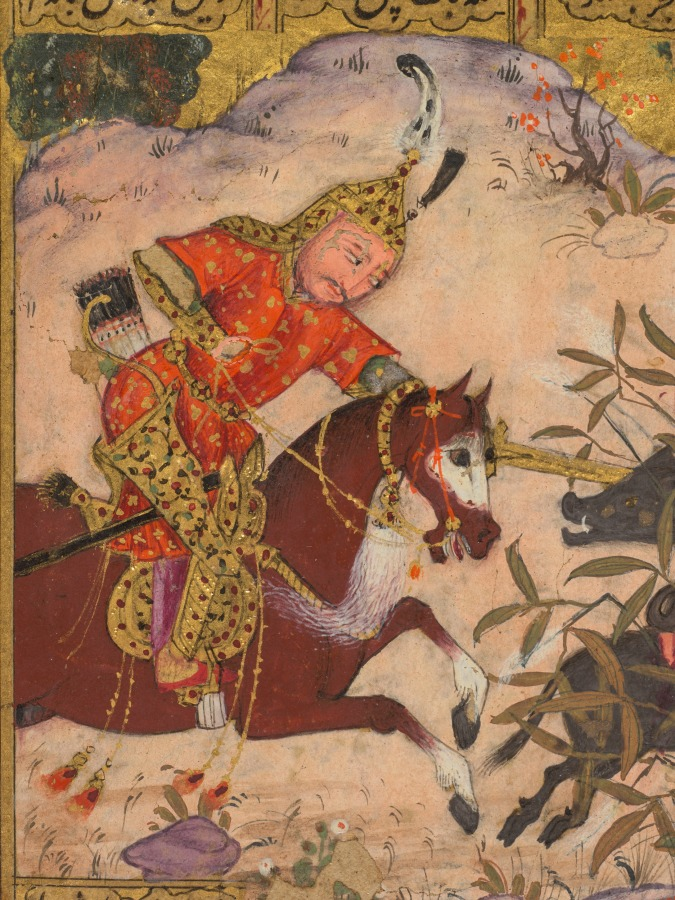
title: Bijan killing the wild boars of Irman, from a Shah-nama (Book of Kings) of Firdausi (Persian, about 934–1020) (verso)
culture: India, Bijapur, Deccan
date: c. 1610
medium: Gum tempera, ink, and gold on paper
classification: Painting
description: This illustrated page from a Shah-nama depicts the first adventure of the hero Bijan, son of an Iranian knight. When reports arrived at the king’s court of wild boars ravaging the borderlands between the enemy realms of Iran and Turan, Bijan volunteered to hunt and kill the beasts, much to the chagrin of his father, who doubted his young son’s ability to navigate the politically volatile situation. The fearless Bijan is shown on horseback as he singlehandedly strikes the bodies of the boars in the brush. After overzealously celebrating his success, Bijan must be rescued from a pit by Rustam. This early manuscript from the Deccan made for the sultan of Bijapur is characterized by glowing colors and lavish use of gold.